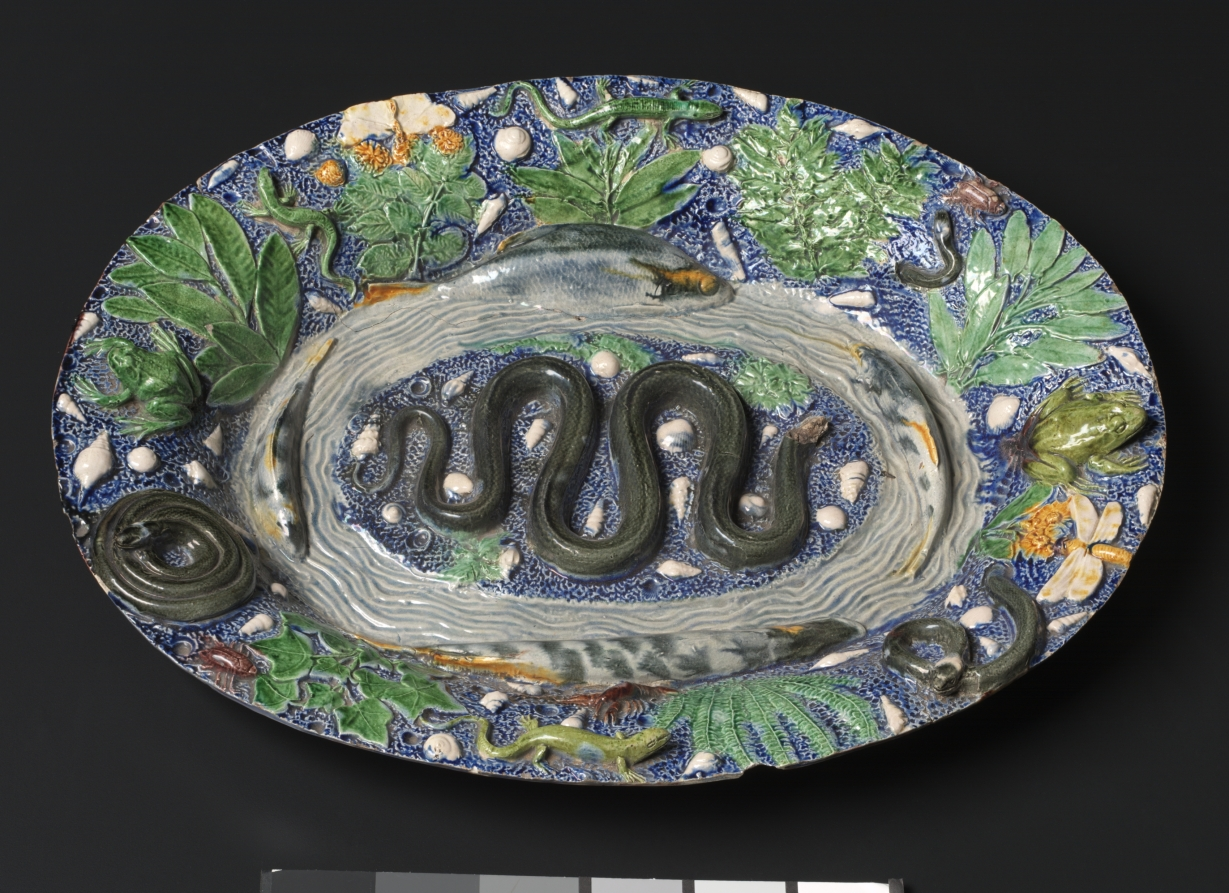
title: Rustic Platter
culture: France, 16th century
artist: manner of Bernard Palissy (French, 1510–1589)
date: late 1500s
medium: lead glazed earthenware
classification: Ceramic